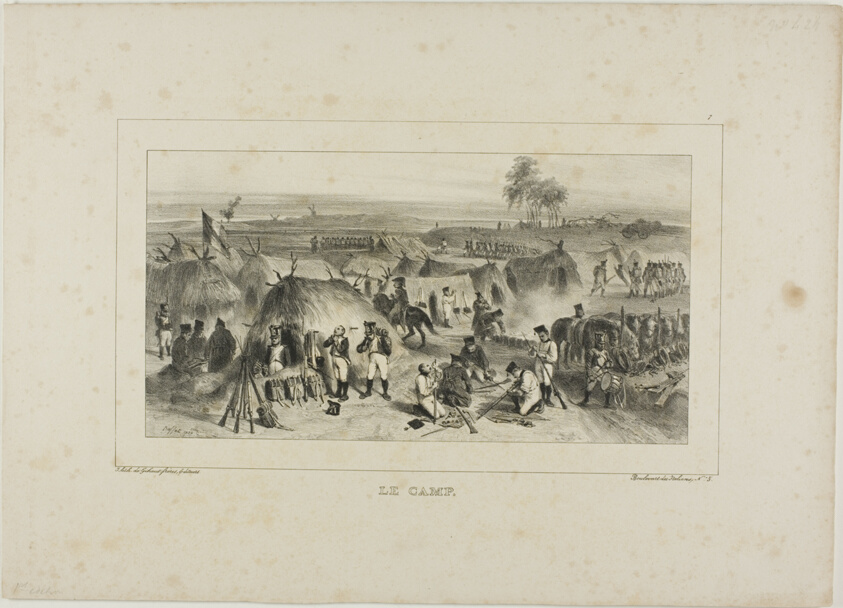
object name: Print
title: The Camp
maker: Denis Auguste Marie Raffet (French, 1804-1860); printed by Chez Gihaut Frères (French, 19th century)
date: 1836–37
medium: Lithograph in black on ivory wove paper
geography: France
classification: lithograph; print; prints and drawing